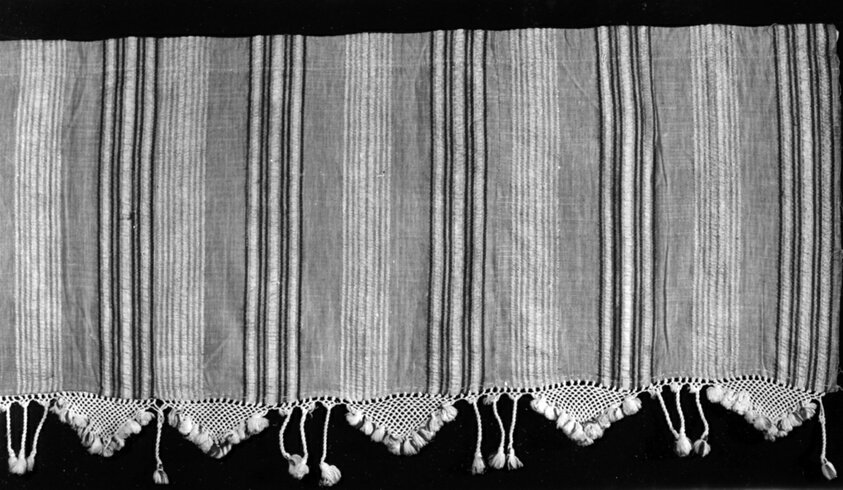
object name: Textile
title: Bed Valance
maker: United States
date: Late 19th century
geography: United States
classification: textile; weaving